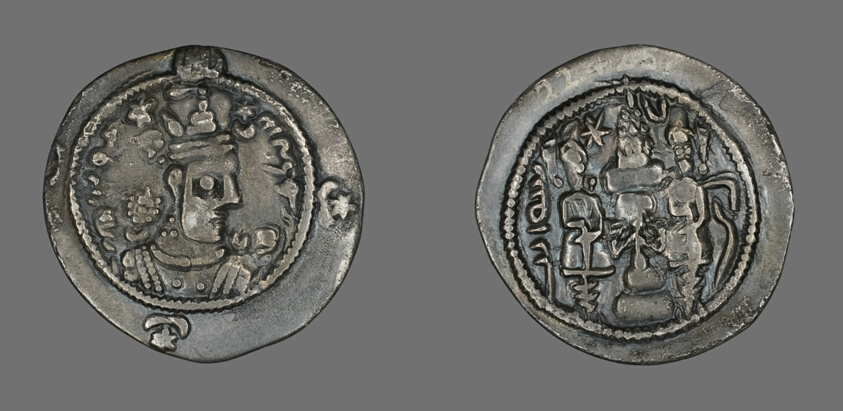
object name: Coin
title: Drachma (Coin) Portraying Chosroes I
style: sassanian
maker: Sasanian; Persia (now Iran)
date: 531-579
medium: Silver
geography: Iran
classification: coin; ancient art